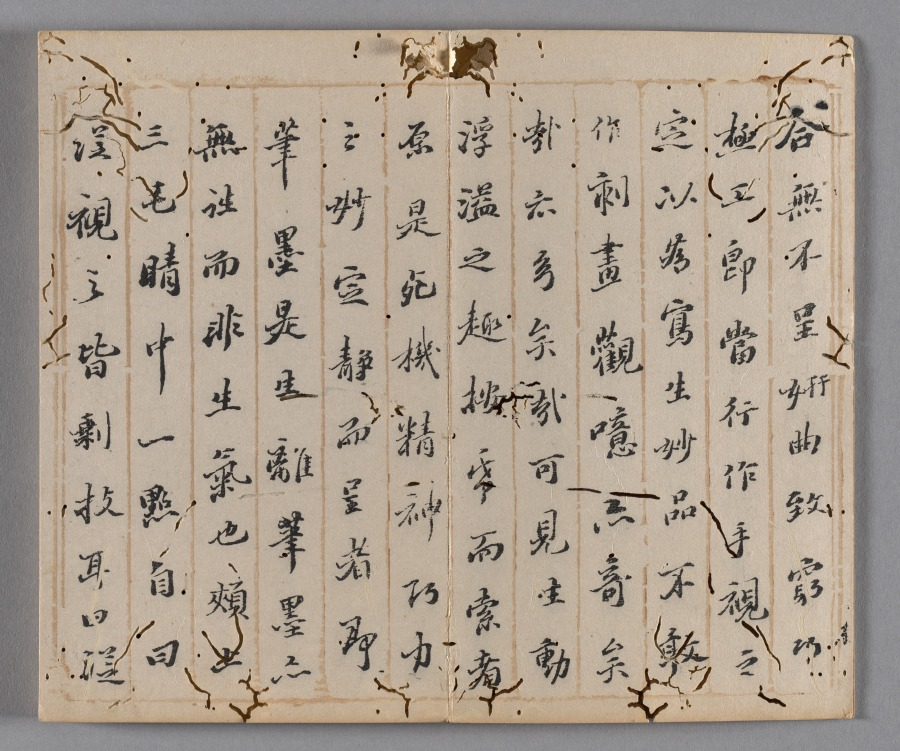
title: Ten Bamboo Studio Painting and Calligraphy Handbook (Shizhuzhai shuhua pu): Birds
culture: China, Qing dynasty (1644-1911)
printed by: Hu Zhengyan (Chinese, c. 1584–1674)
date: 1633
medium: Woodblock-printed book; ink and colors on paper; first edition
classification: Print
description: Color printing reached a level of perfection in the early 1600s, as seen in this Ten Bamboo Studio Collection of Calligraphy and Painting and the Mustard Seed Garden Manual of Painting (printed 1679 and 1701). The painterly quality, precision in registering (aligning) the woodblocks, and harmonious colors made them the most successful color print editions in Chinese history. Both editions were printed and compiled in Nanjing, spread nationwide, and had a great impact on the arts in Japan and Korea.